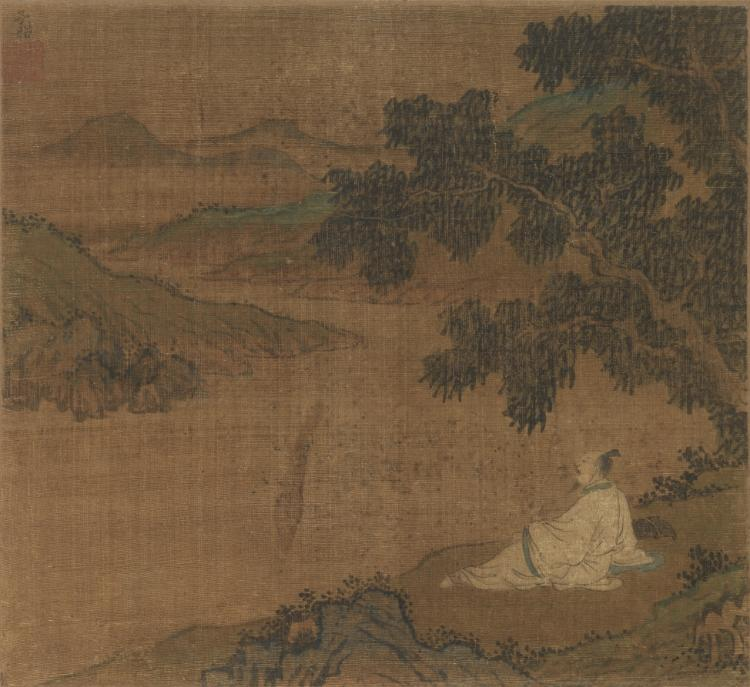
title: Man on a Hillside under a Tree Overlooking a River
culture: China, Ming dynasty (1368-1644) ?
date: 1368?-1644?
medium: Album leaf, ink and color on silk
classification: Painting